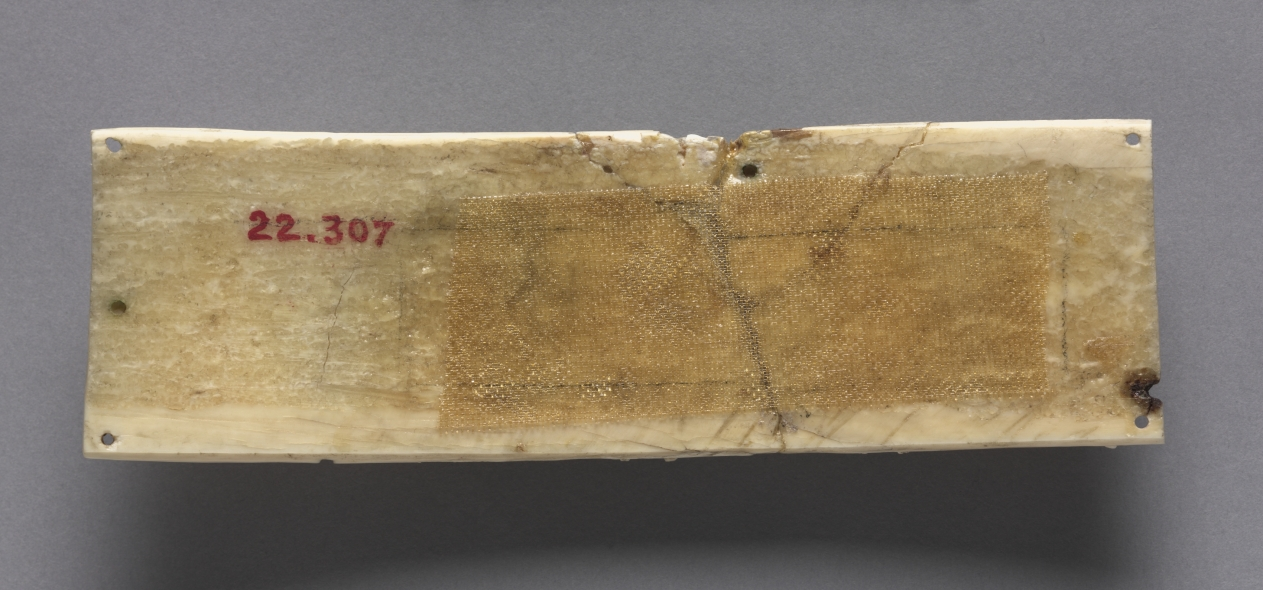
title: Plaque from a Portable Altar: Christ and the Apostles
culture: Germany, Lower Rhine Valley, Romanesque period, 11th century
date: 1050–1100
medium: walrus ivory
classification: Ivory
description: This intricately carved ivory panel once decorated the side of a portable altar. One of three it depicts Christ in Majesty and his apostles, and was the first major acquisition of William M. Milliken, the museum's first curator of decorative arts and later director (1930–1958). As Milliken later recalled, the pieces "were immensely intriguing, monumental in scale, even if tiny in size, the Christ in the mandorla could have been enlarged and would have graced the tympanum of a great cathedral."